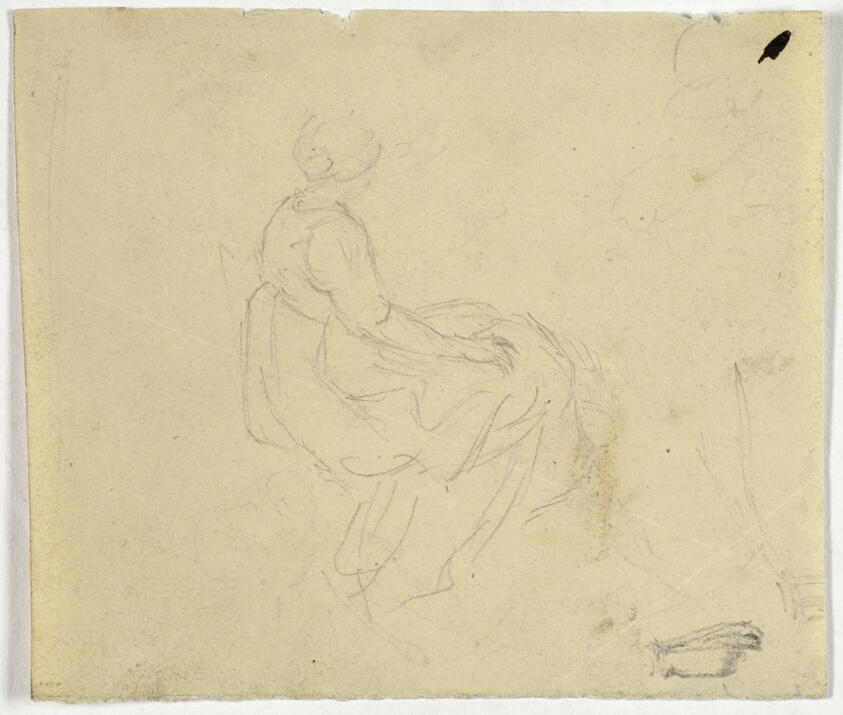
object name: Drawing and Watercolor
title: Woman Sitting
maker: William Henry Pyne (English, 1769-1843)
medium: Graphite on cream wove paper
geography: England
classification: graphite; drawings (visual works); prints and drawing